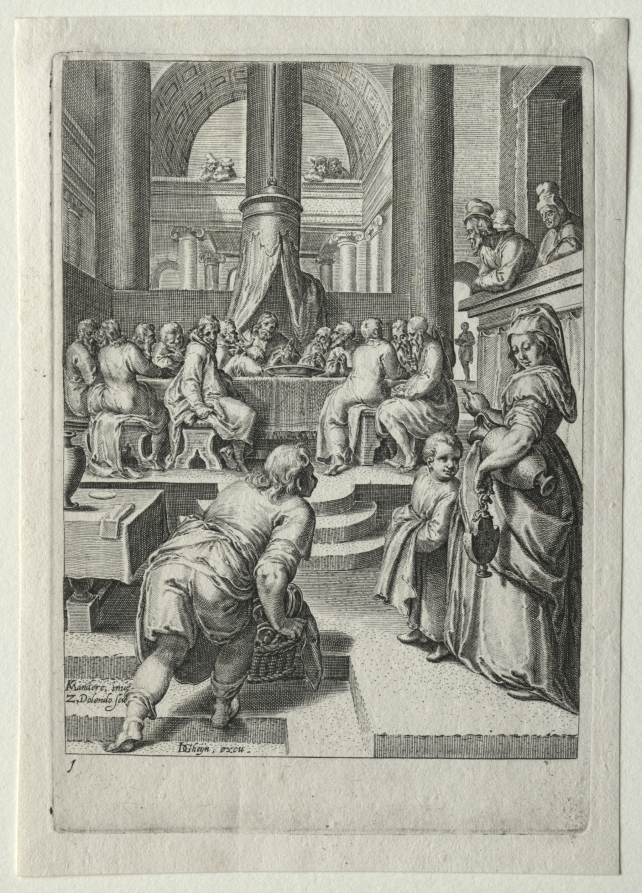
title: Life of Christ: The Last Supper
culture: Netherlands, 16th century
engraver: Zacharias Dolendo (Dutch, 1561–1604)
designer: after Karel I van Mander (Netherlandish, 1548–1606)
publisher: Jacob de Gheyn II (Netherlandish, 1565–1629)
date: 1596–98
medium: engraving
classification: Print